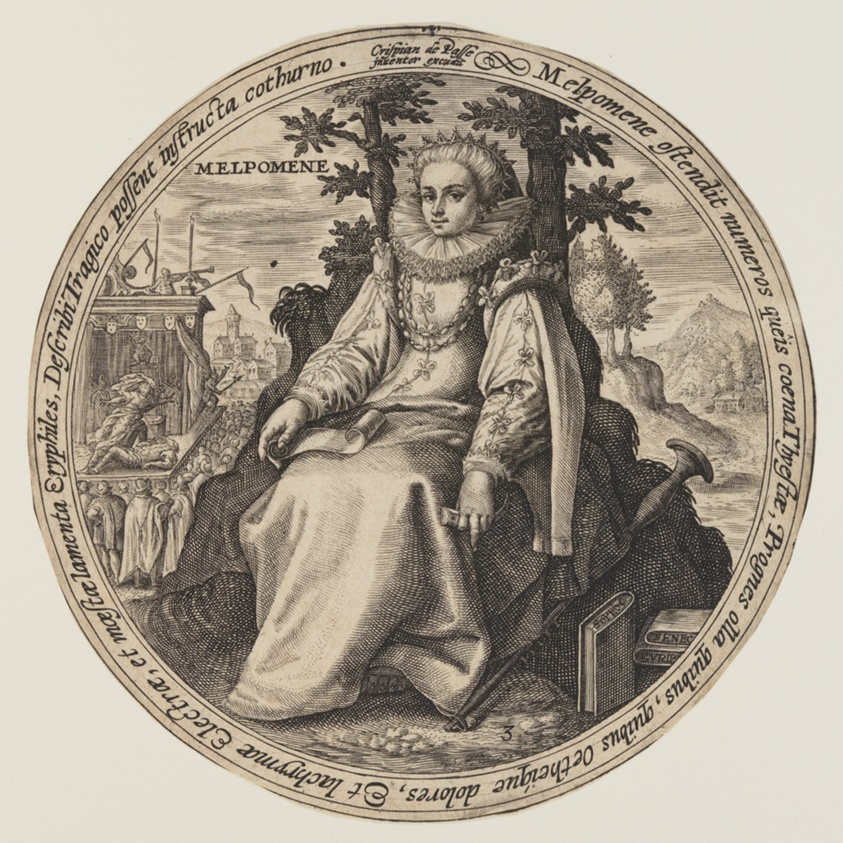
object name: Print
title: Melpomene, from The Muses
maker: Crispijn van de Passe I; Dutch, c. 1565–1637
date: c. 1590-1620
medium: Engraving on ivory laid paper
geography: Netherlands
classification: engraving; paper; print; prints and drawing